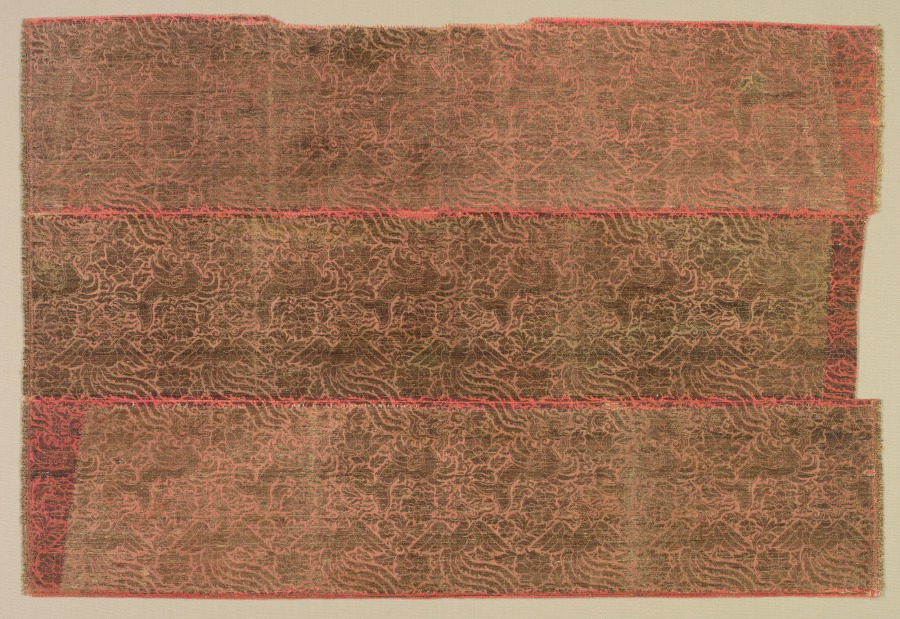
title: Makaras, Phoenixes and Flowers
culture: Central Asia or Daidu, 13th century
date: 1200s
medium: lampas, silk and gold thread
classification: Textile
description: Central Asian designers drew from a wide variety of motifs, both imaginary and real. In this silk, rows of soaring phoenixes alternate with rows of makaras. Combining a fish body and tail, wings, and a dragon's head, the makara originated in India as a water creature. With the spread of Buddhism, the motif migrated into the art of Central Asia and, from there, into the art of northern China. In Italy, exotic Central Asian patterns such as this inspired flights of imagination. One such example (seen in the photograph below) shows a creature, strikingly similar to the makara, spewing forth a dragon while a dog walks up its back.